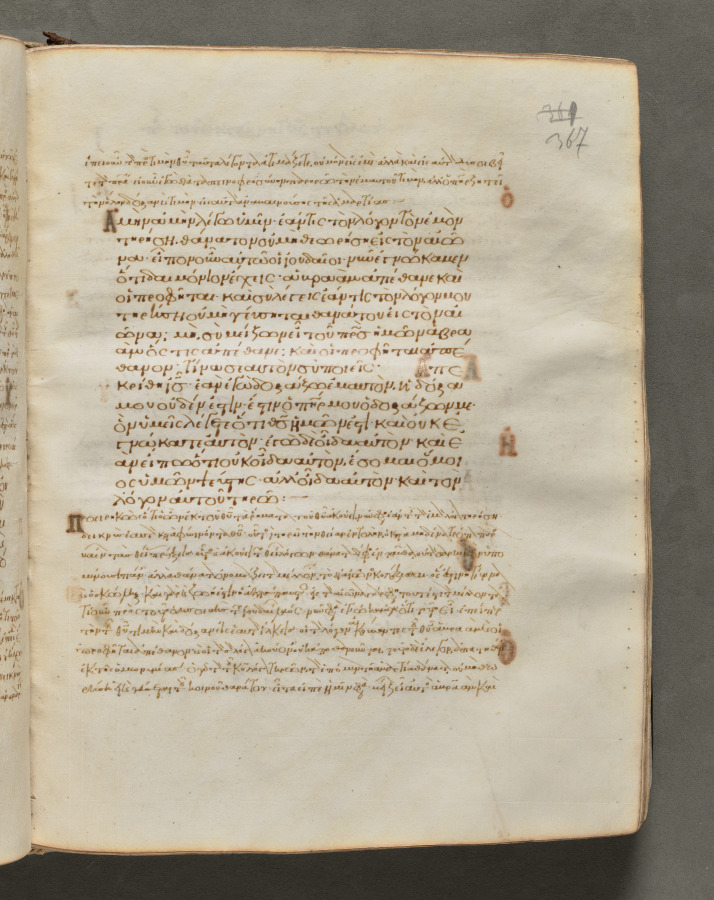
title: Text, folio 367 (recto), from a Gospel Book with Commentaries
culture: Byzantium, Constantinople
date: c. 1000–1100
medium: ink, tempera, and gold on vellum; leather binding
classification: Bound Volume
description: Each of the four gospels in this book opens on a page with brilliantly illuminated borders depicting the author of the text as well as birds—principally peacocks, symbols of the immortality of the soul—and fountains, representing the fountain of life and the salvation of the soul. This volume consists of 428 leaves with texts in Greek. Its level of sophistication suggests that it was probably written and decorated in a monastery in Constantinople.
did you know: Gospel books were carried in procession through Byzantine churches.